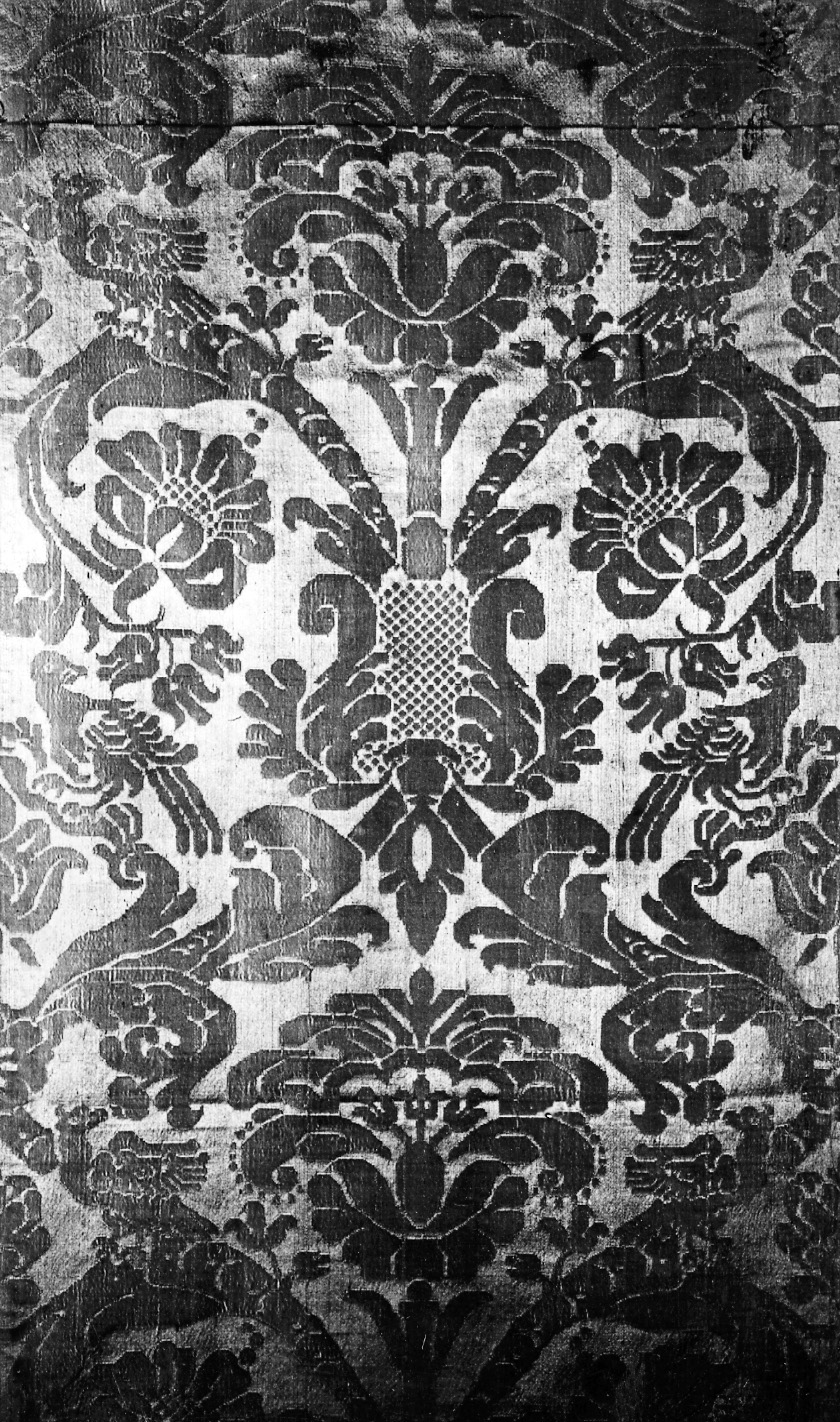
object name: Textile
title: Panel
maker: Italy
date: 16th/17th century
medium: Silk, satin damask weave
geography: Italy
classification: textile; weaving